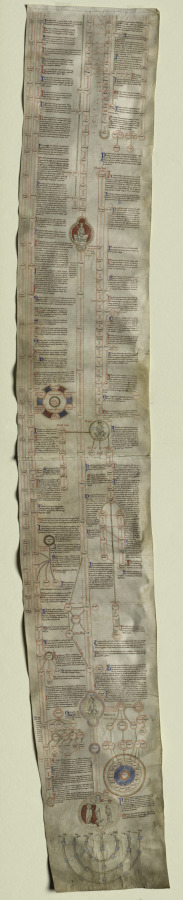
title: Peter of Poitiers's "Compendium Historiae in Genealogia Christi"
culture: England, Canterbury, 13th century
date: c. 1220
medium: ink and tempera on a vellum roll of four membranes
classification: Manuscript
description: This manuscript roll, composed of four membranes formerly stitched together in a continuous roll about nine feet long, has been divided in the middle for easier visibility and study. The text is an abridgment of biblical history focused on the descent of Christ from Adam. It was written by Peter of Poitiers (about 1130–1205), who taught theology and history in Paris and was widely copied. The present roll is an English copy of Peter's text made shortly after his death. Although manuscript rolls were hung on the walls of a classroom as instructional aids to students, some of them have value beyond their textual and historical interest because of the fine quality of their drawings, as seen here. A comparison with Canterbury manuscripts and stained glass of around 1220 is the basis for the attribution to Canterbury. Peter of Poitiers's aim in this project was to assist students prevented from mastering biblical history because of its length and because they were too poor to own books. His text on roll is the briefest possible summary of biblical history. It is arranged in six historical stages, denoting the six ages of the world, as decreed by theological tradition. The first five ages were inaugurated by Old Testament individuals: Adam, Noah, Abraham, David, and Sedecias. The birth of Christ heralded the sixth stage. Beginning at the top of the first membrane, the text consists of brief biographical entries on the ancestors of Christ (Adam, Noah, Abraham, Moses, and David) and other biblical personalities. These extend to the birth of Christ on the fourth membrane, ending with accounts of Hebrew and Roman kings and the Apostles. Each compendium shows the names of the ancestors inscribed within circles, those of direct descent placed vertically in a central column, others scattered in clusters to the right and left. The decoration of the roll consists of a series of medallions of diverse geometrical frames filled with either a figural drawing or a diagram. The style of these pen-and-ink drawings, some illuminated in tempera or tinted with wash, stems from English manuscript and glass painting attributed to the school of Canterbury Cathedral. The style of the museum's illustrations is so close to the stained glass panels made for Trinity Chapel at Canterbury (about 1220) to suggest that an artist active as a glazier in the Cathedral workshop may also have executed the manuscript. In the least, the painter of the roll manuscript was familiar with the style of the painted glass, and on this basis, a date of about 1220 seems appropriate. Additional evidence is supplied by a psalter illuminated at Canterbury shortly before 1220. The figurative scenes in this psalter were apparently illustrated by the same hand that executed the line and wash drawings in the museum's roll.